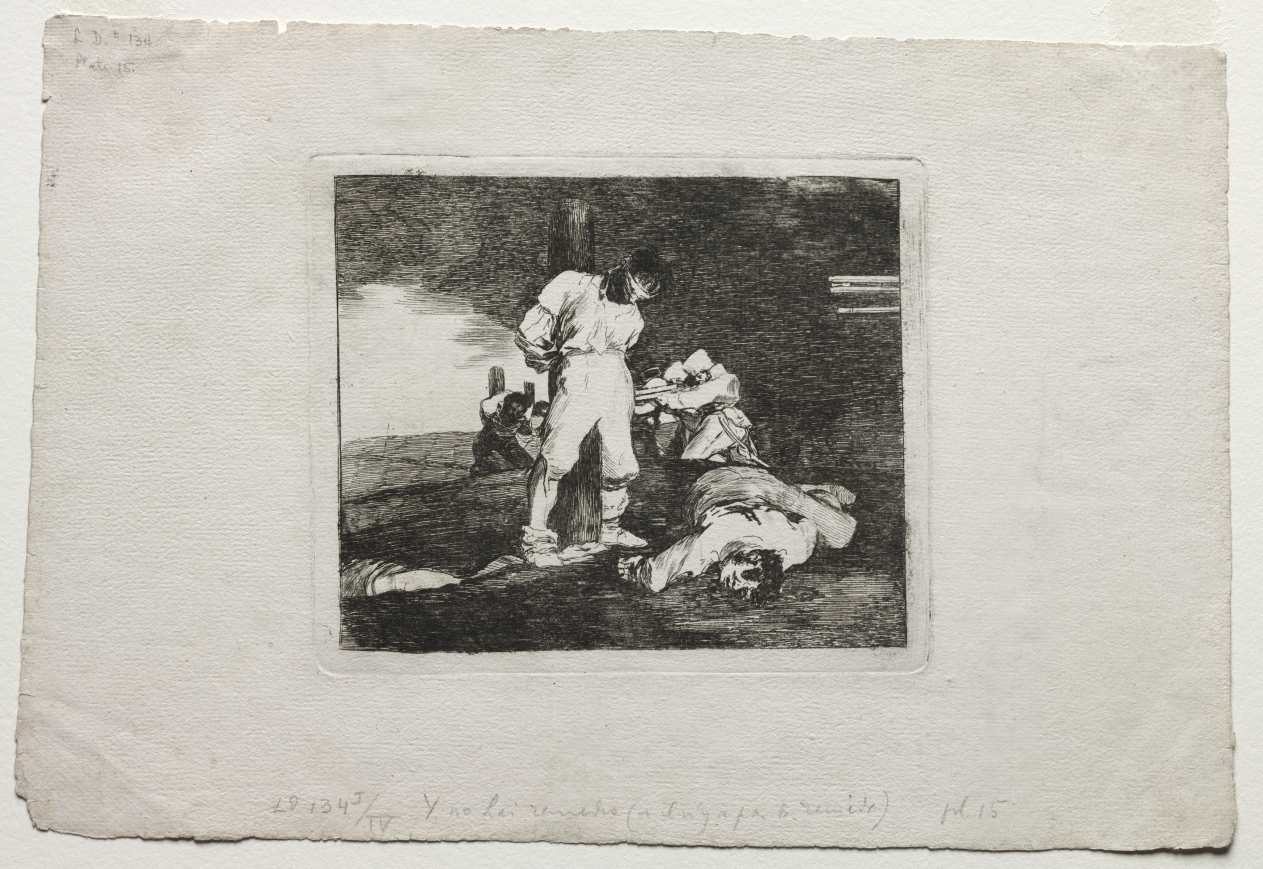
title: The Disasters of War: And There's No Help for it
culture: Spain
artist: Francisco de Goya (Spanish, 1746–1828)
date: 1810–1820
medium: etching, drypoint and burin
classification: Print